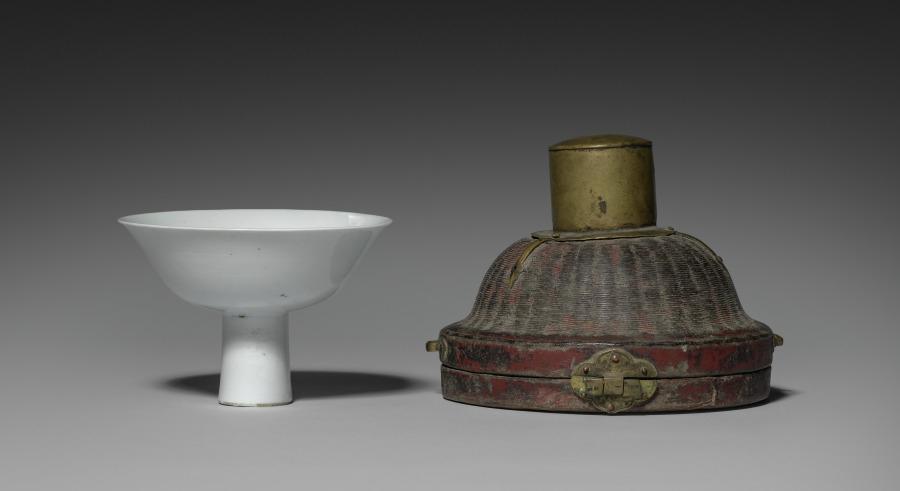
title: Stem Cup with Buddhist Emblems: Shufu Ware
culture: China, Jiangxi Province, Yuan dynasty (1271–1368)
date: 1300s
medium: porcelain with molded decoration and white glaze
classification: Ceramic